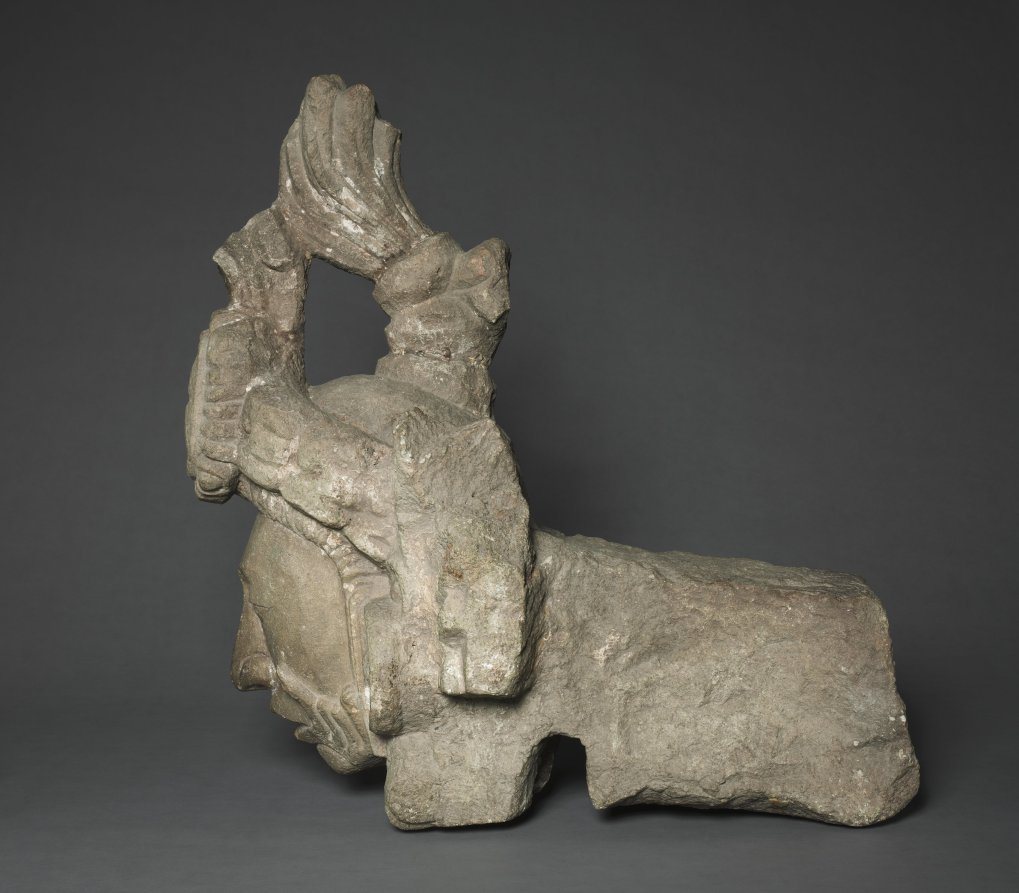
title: Head of a Young Noble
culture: Honduras, Copán, Structure 10L-22A, Maya style (250-900)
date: 746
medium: stone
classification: Sculpture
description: This young noble may be a political official of 8th-century Copán, an important site in eastern Maya territory. The noble, who embodies the Maya ideal of masculine beauty, wears circular ear ornaments and a headband, above which the tied hair rises. The meaning of the disembodied hand that cups the chin is debated. The head, collected by Harvard archaeologists in the 1890s, comes from the facade of a building may have been used as a council house by a Copán ruler and his advisors during a crisis that rocked the city’s ruling dynasty. On the structure’s upper level, above woven mat signs that symbolized political authority, eight figures were enthroned in T-shaped recesses. This head is from one of these figures. Beneath each recess was a hieroglyph thought to name an important town (or family) within Copán’s domain. The figures may represent these towns’ advisors to the king, whose image crowned the structure.